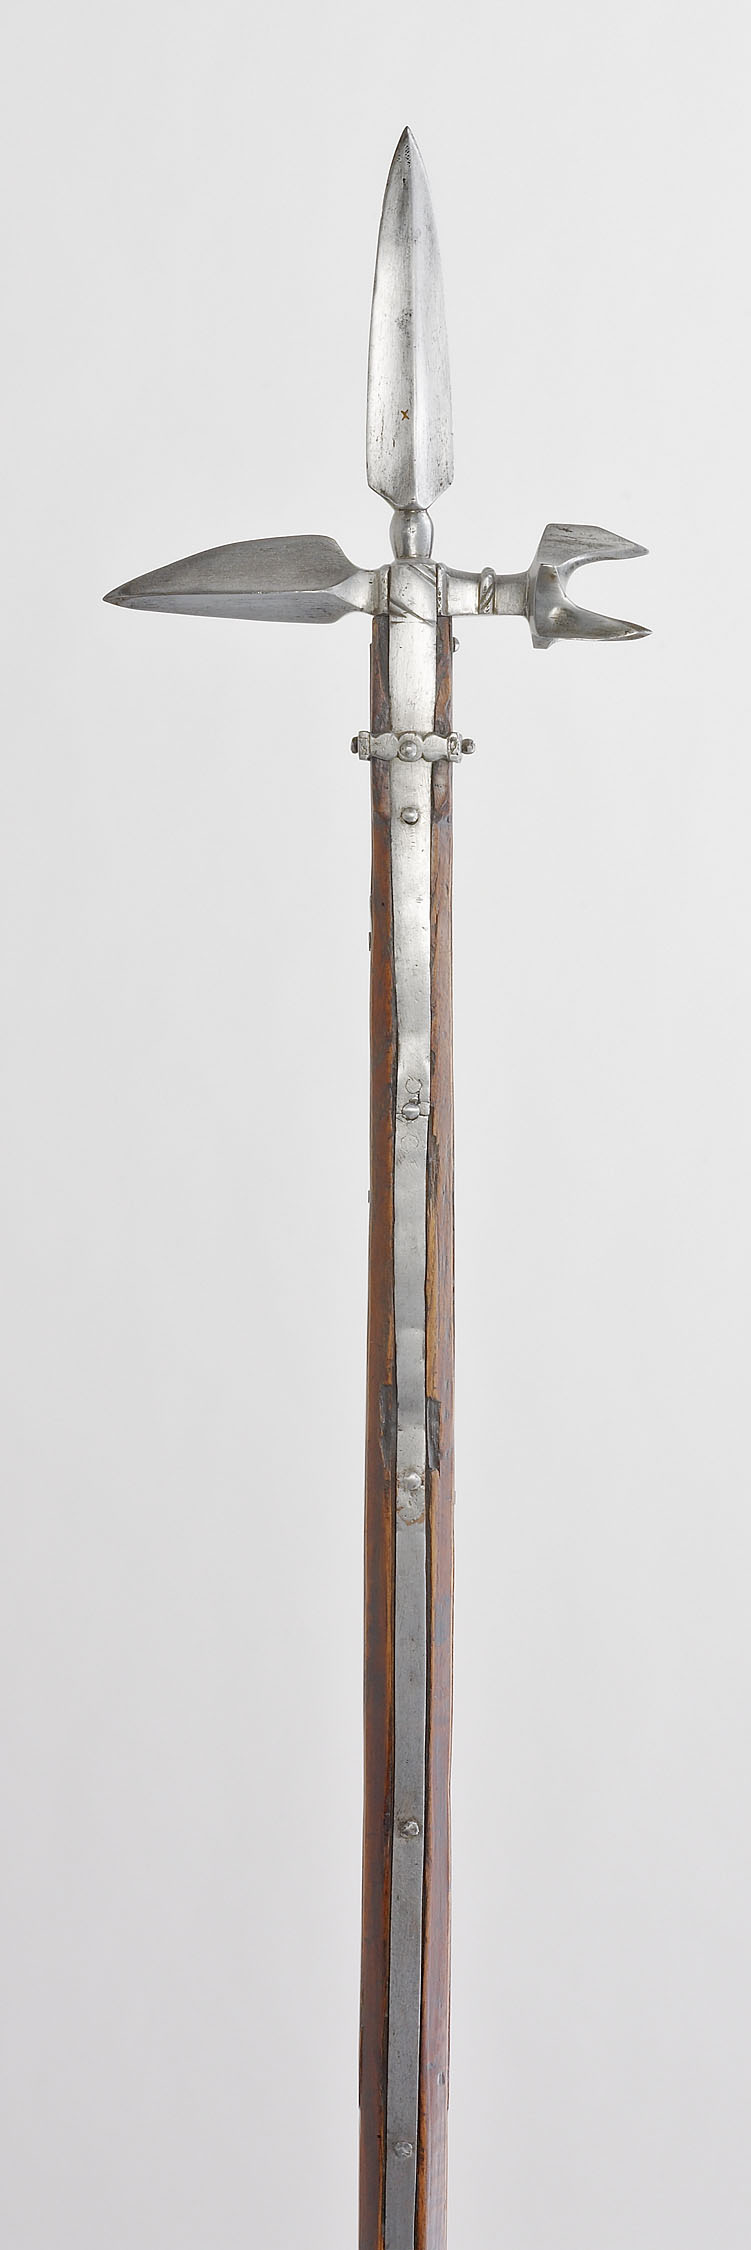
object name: Arms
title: Poleax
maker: Western European, probably Italian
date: c.1470—c.1520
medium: Steel and oak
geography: Italy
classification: edged weapon-staff; shafted weapon; arms; arms and armor